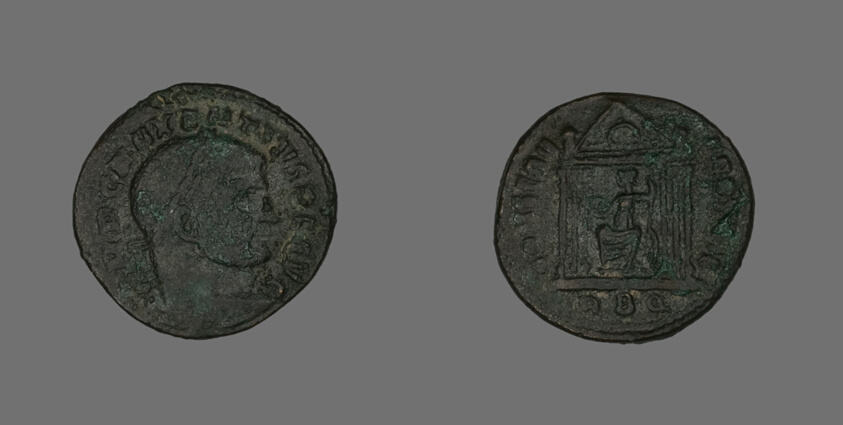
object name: Coin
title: Follis (Coin) Portraying Emperor Maxentius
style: roman (ancient, style or period)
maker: Roman, minted in Rome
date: 308-310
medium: Bronze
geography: Roman Empire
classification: coin; ancient art